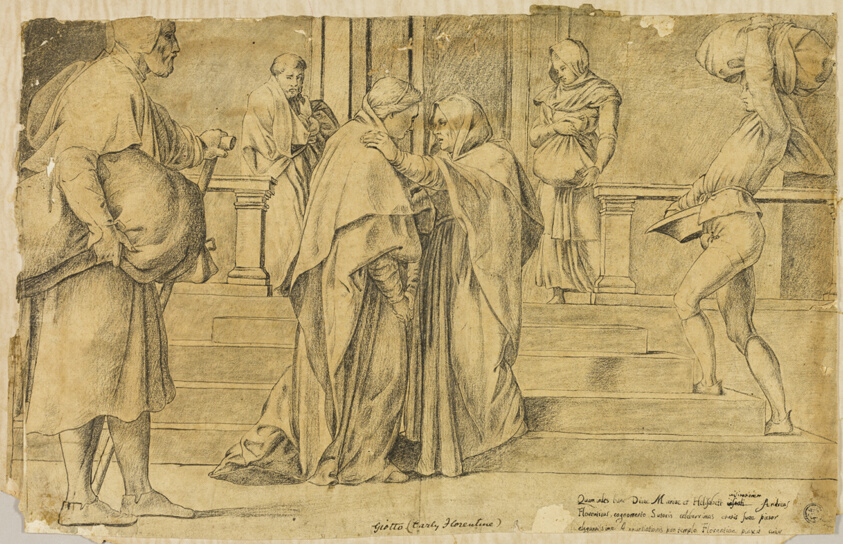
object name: Drawing and Watercolor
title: Visitation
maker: After Andrea del Sarto; Italian, 1486-1530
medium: Pen and black ink, and black crayon, on tan laid paper, laid down on tan laid paper, tipped on buff card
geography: Italy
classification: pen and ink drawings; drawings (visual works); prints and drawing